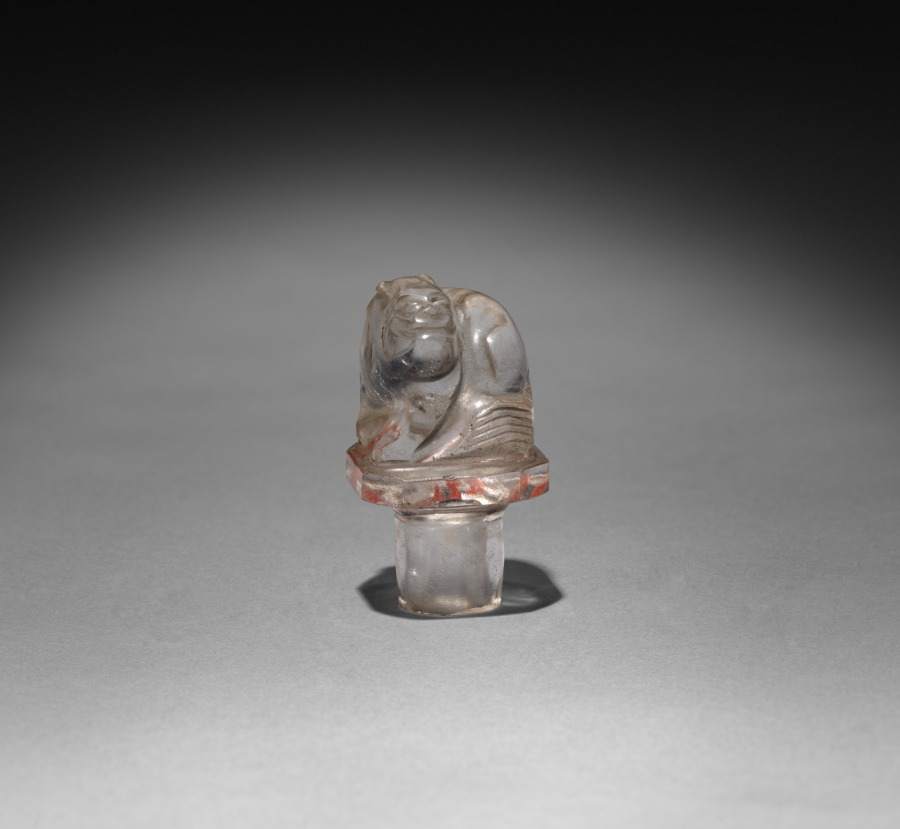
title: Six-Sided Bottle (stopper)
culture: China, Qing dynasty (1644-1911)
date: 1644–1911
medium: rock crystal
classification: Rock crystal